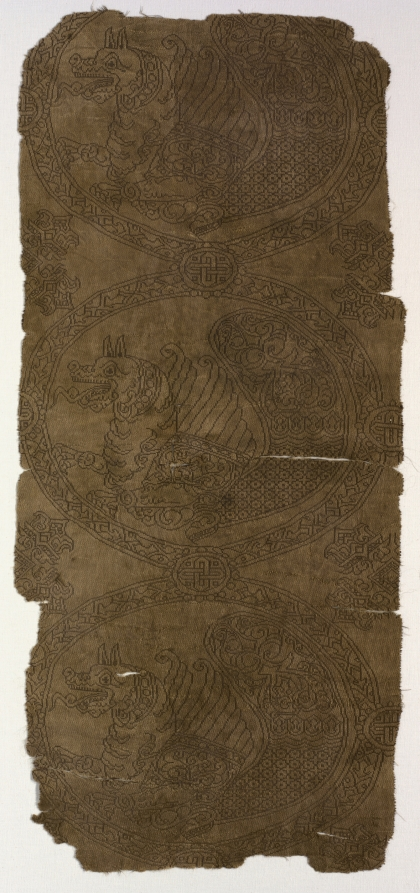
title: Fragment with Senmurvs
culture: Iran or Iraq, in the style of the Abbasid period (750–1258)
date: prior to 1971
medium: Silk: lampas weave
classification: Textile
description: This fragment preserves three large, aligned, tangent ovals in a column. Each oval contains a senmurv ornamented with foliate and geometric forms; the border contains a stylized foliate motif. Ovals are joined at their cardinal points with a cross-shaped geometric figure within a smaller oval bordered with pearls. Interspaces contain X-shaped medallions consisting of four palmettes around a diamond center. According to recent analysis of the museum’s Buyid and Abbasid textile materials, some have been identified as modern reproductions.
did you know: Senmurvs are benevolent, mythical birds in Persian mythology and literature.